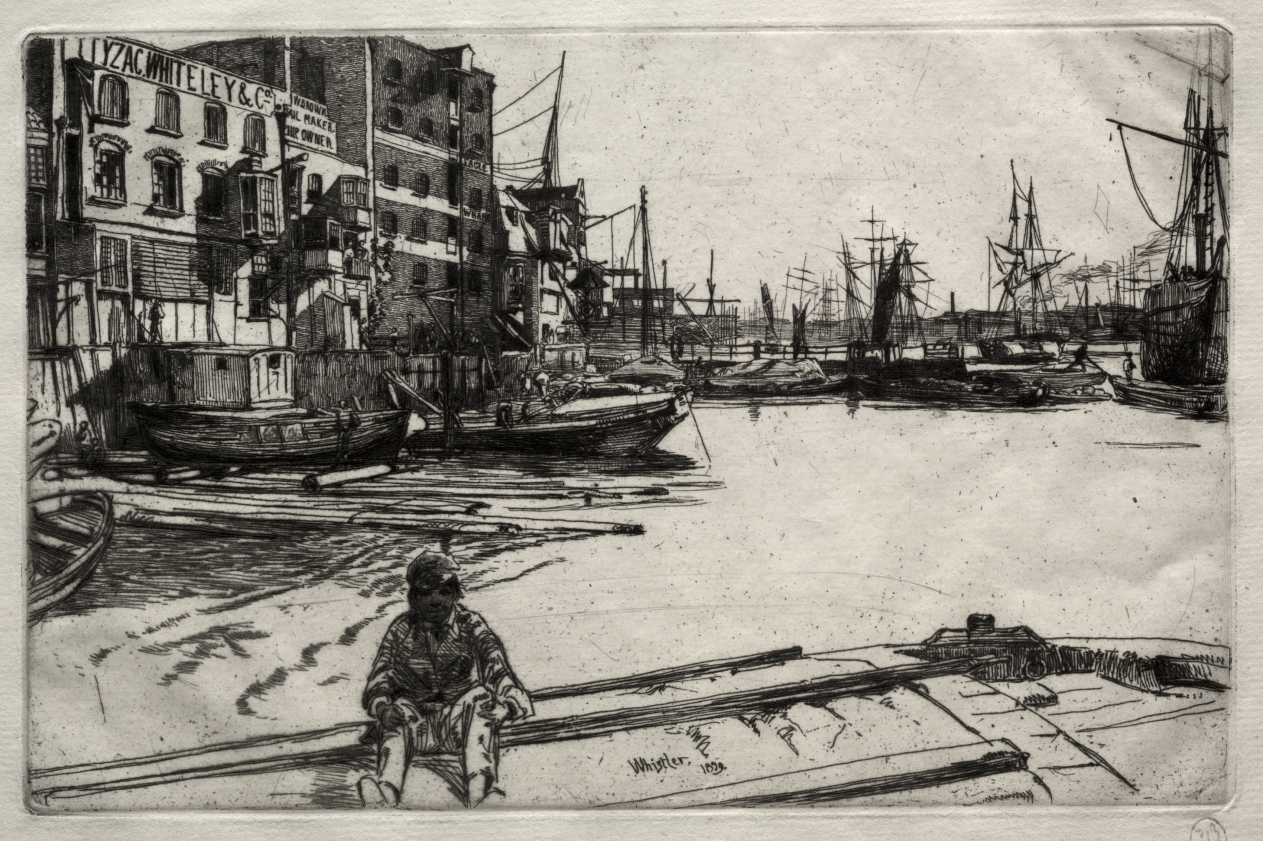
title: Eagle Wharf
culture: America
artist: James McNeill Whistler (American, 1834–1903)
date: 1859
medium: etching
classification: Print